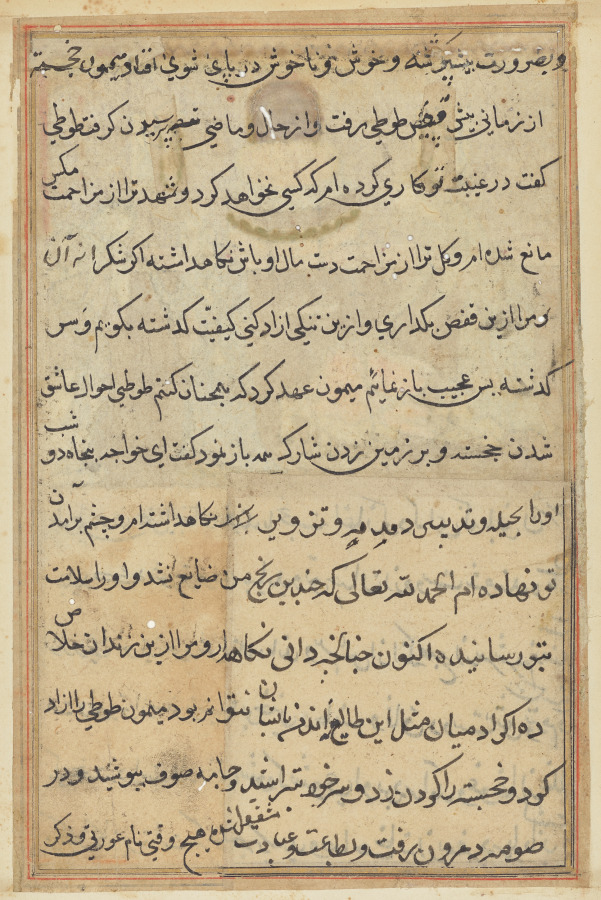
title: Page from Tales of a Parrot (Tuti-nama): text page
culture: Mughal India, court of Akbar (reigned 1556–1605)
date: c. 1560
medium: gum tempera, ink, and gold on paper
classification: Painting